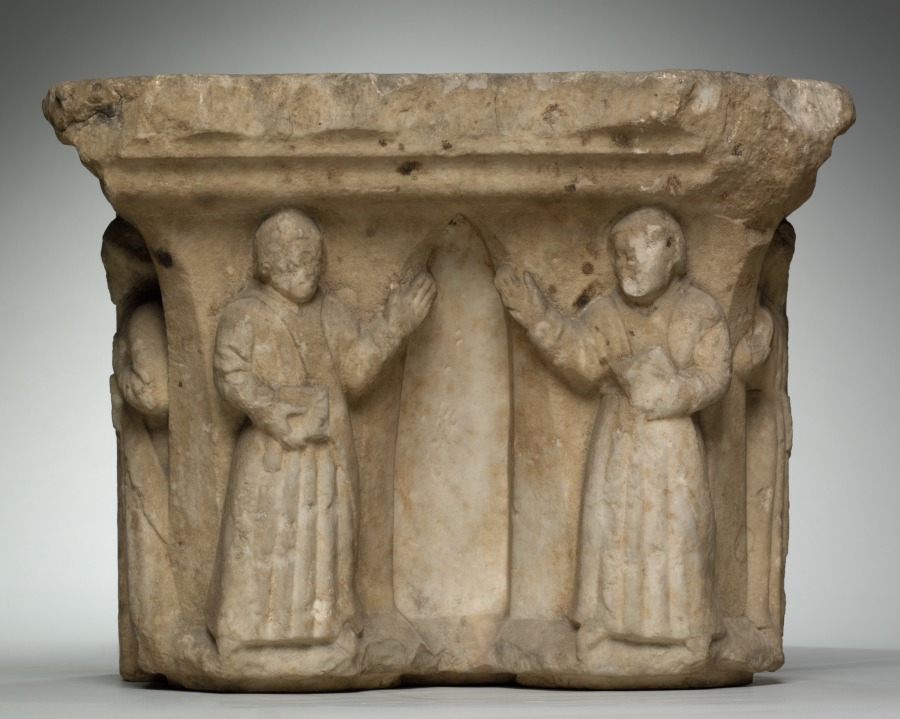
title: Engaged Capital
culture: Southern France, Abbey of Larreule, near Tarbes, 15th century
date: 1400s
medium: limestone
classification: Sculpture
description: This capital belongs to a surviving group including other architectural fragments that once decorated the cloister of the Abbey of Larreule. A cloister was a covered walkway or arcade, usually around all four sides of a square area of grass (the "cloister garth"). The seclusion of the cloister was the monks’ exclusive domain, off limits to others. Here, the monks were supposed to pray, study, meditate, and exercise in privacy and solitude. Such cloister capitals served both to instruct the monks and as a focus for their devotions. Other capitals in this series are installed in the Jardin Massey at Tarbes, near the original abbey. An arch from Larreule has been assembled with other associated French capitals at The Cloisters in New York.